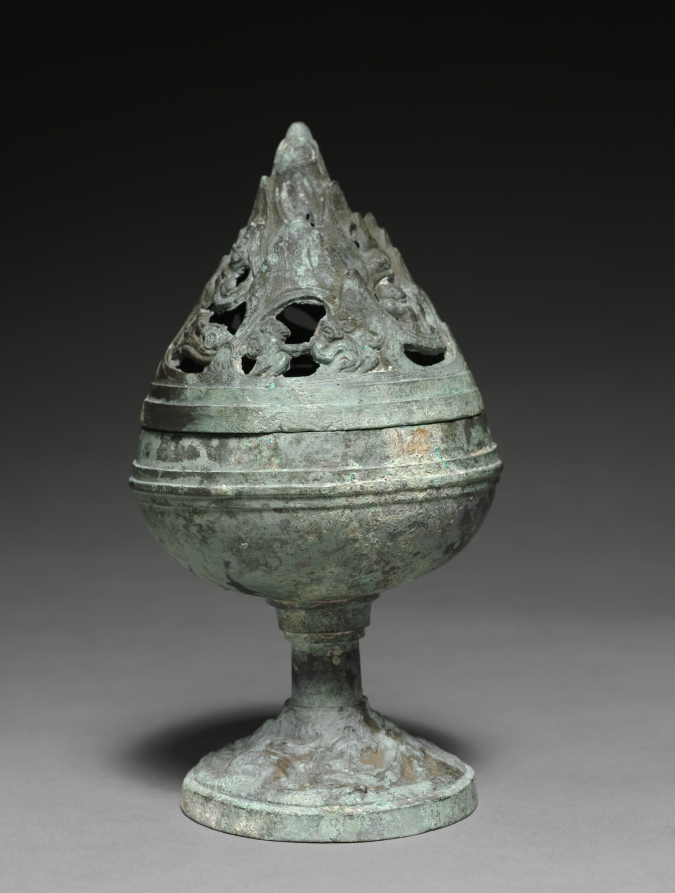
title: Incense Burner (Boshan Lu)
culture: China, Western Han dynasty (206 BCE–8 CE)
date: 200–100 BCE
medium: bronze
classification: Metalwork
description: The conical cover of this incense burner represents a miniature mountain with hunting scenes. The cover was shrouded in mist and emanated intoxicating smoke through its openwork when fragrant woods and herbs were burnt in its stem cup, transporting its beholder into an imaginative realm.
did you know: Deities (appearing as hunters) and fantastic beasts roam freely among mists and clouds on this incense burner.